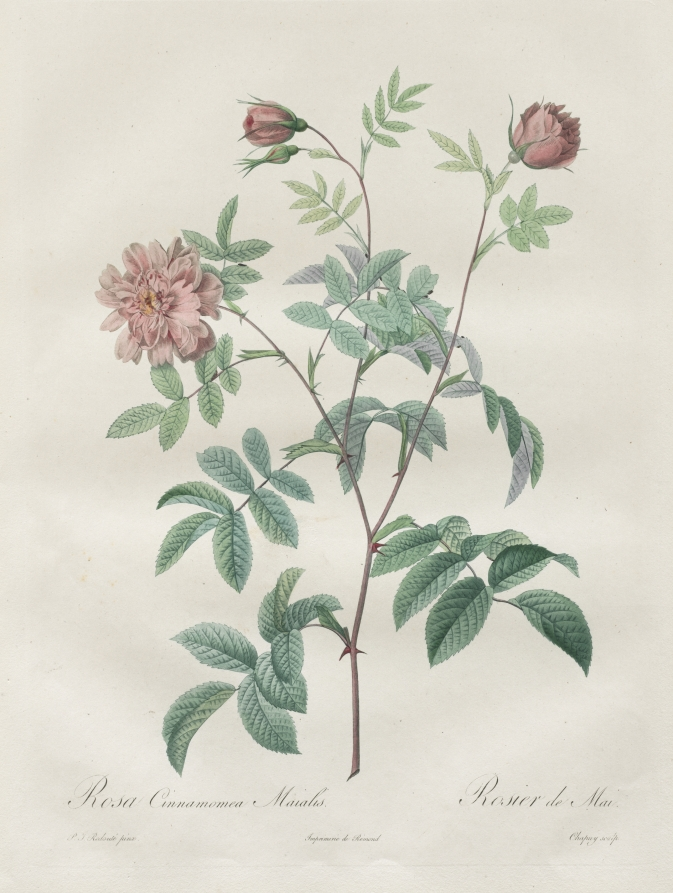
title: Les Roses: Rosa cinnamomea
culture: France, 19th century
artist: Henri Joseph Redouté (French, 1766–1853)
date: 1817–1824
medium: stipple and line engraving, with hand coloring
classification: Print